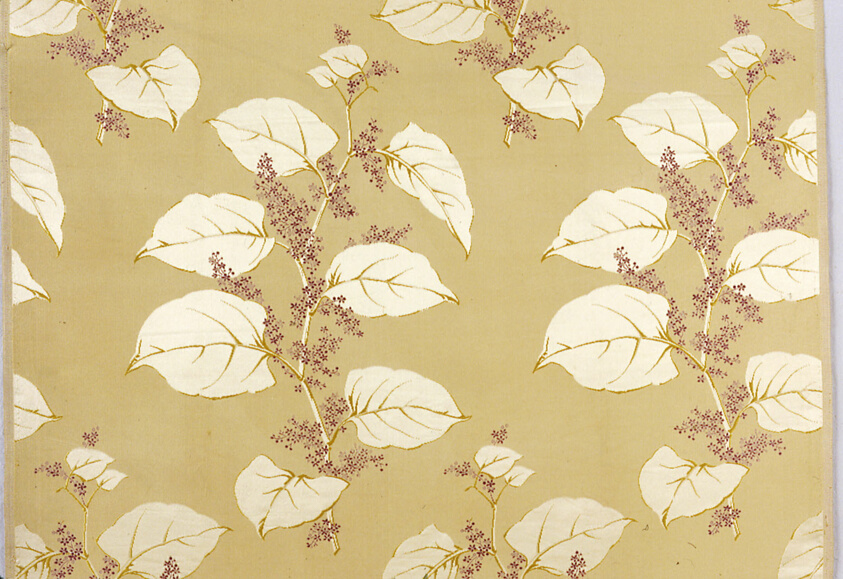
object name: Textile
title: Panel (Dress Fabric)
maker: Possibly from a dress designed by the House of Worth; Possibly Lyon, France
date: c. 1880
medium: Silk, warp-float faced 7:1 satin weave with supplementary patterning wefts and self-patterned by ground weft floats and areas of plain weave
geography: France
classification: textile; weaving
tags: foliage